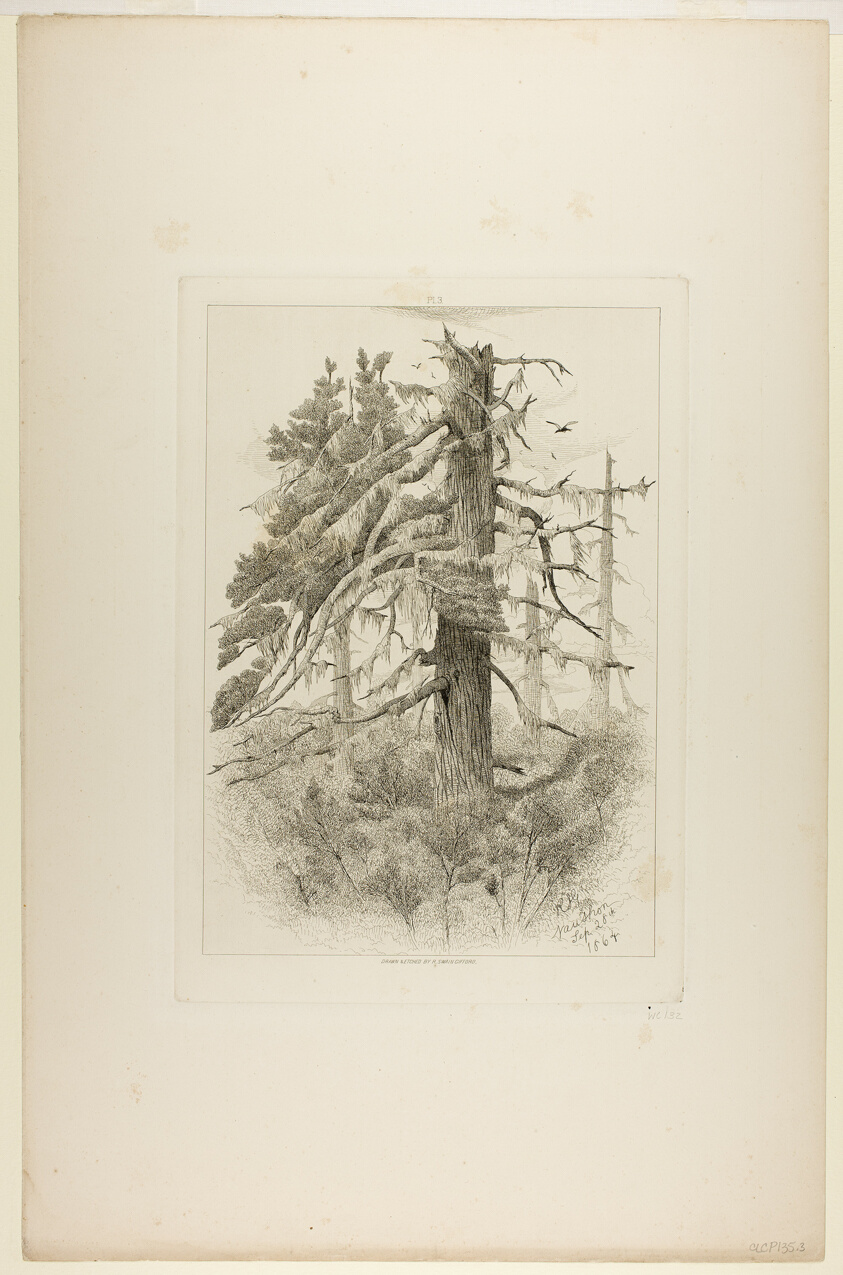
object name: Print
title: Old Trees at Naushon Island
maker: Robert Swain Gifford (American, 1840-1905)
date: 1864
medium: Etching on paper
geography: United States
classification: etching; print; prints and drawing